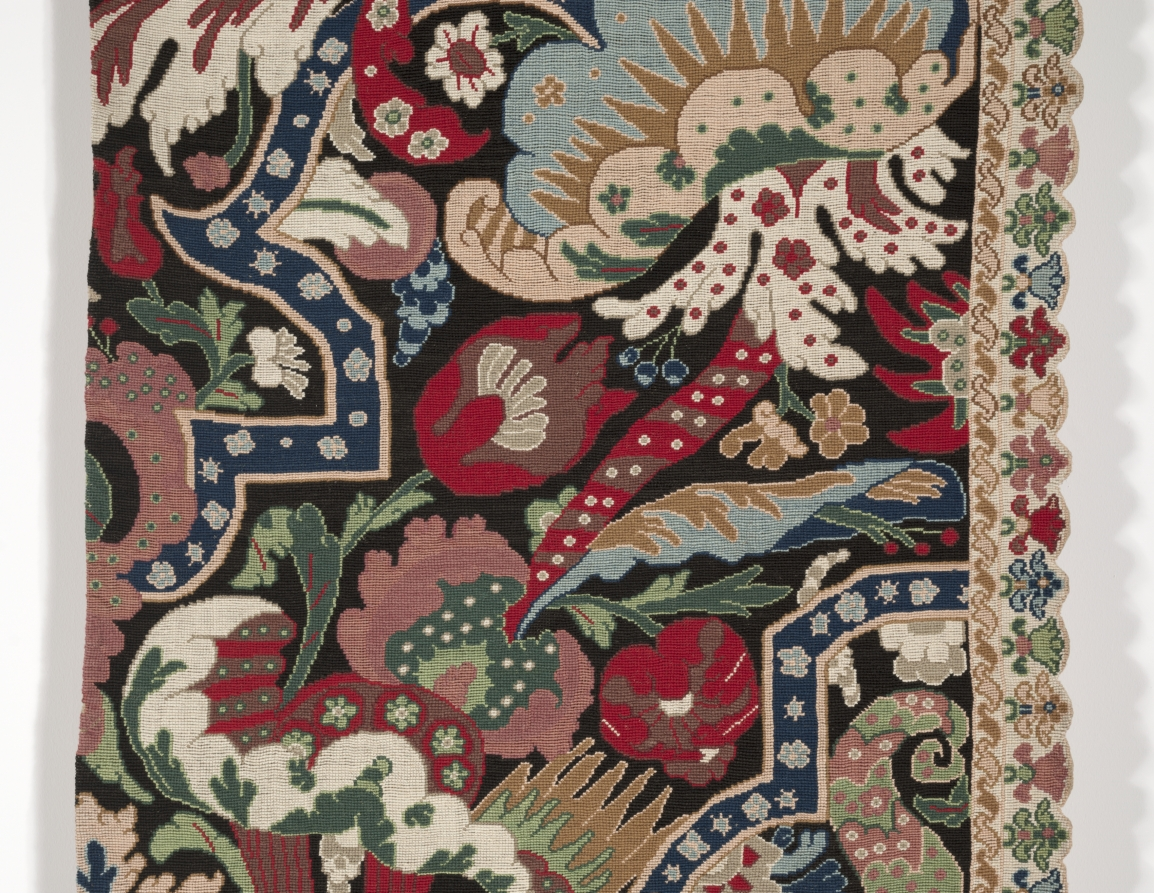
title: Needlework Bed Hanging in the Bizarre style (right half)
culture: France, 18th century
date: 1710–20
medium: needlework, tent and cross stitch embroidery on canvas; silk, wool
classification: Embroidery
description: This panel is one of a pair that would have hung originally around a bed post as part of a full set of hangings on a bedstead in the early 1700's. Elaborate textile hangings were a conspicuous display of wealth since many ladies received their friends within their bedchamber. A full set enveloped the entire bedstead and, when closed, helped retain warmth long after the fire had gone out. This particular pair of panels is remarkable in that they represent many hours of highly skilled needlework. Their design is known as a "bizarre" pattern, which mimicked woven silks of the same era that were asymmetrical, boldly stylized adaptations of Asian fabrics that were coming into the European market from the trading routes at the time.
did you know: The design of this needlework panel is known as a "bizarre" pattern.